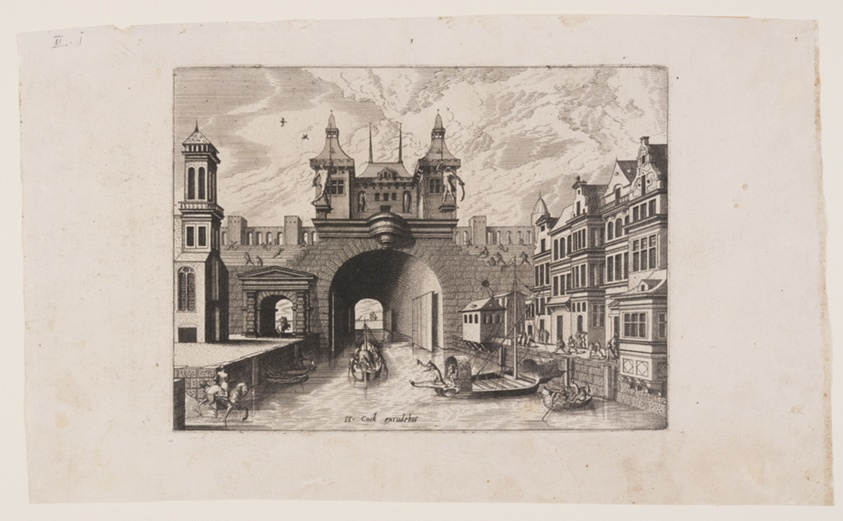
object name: Print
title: View from a canal of the gate bridge with shutters of a fortified town, street façade on the right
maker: Johannes van Doetecum (Netherlandish, 1528/32–1605) and Lucas van Doetecum (Dutch, died before 1584); after Hans Vredeman de Vries (Netherlandish, 1527-1604)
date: 1562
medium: Engraving on ivory laid paper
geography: Netherlands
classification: engraving; paper; print; prints and drawing